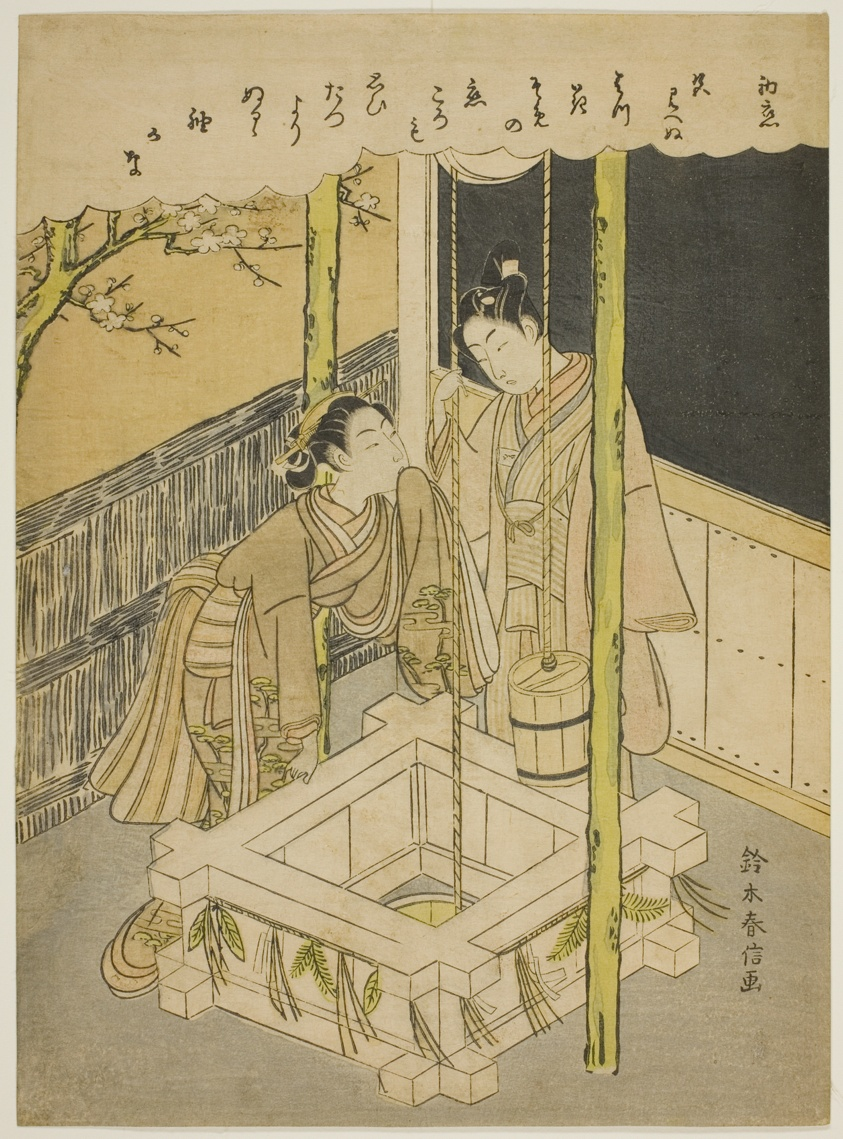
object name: Print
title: First Love (Hatsu koi), a parody of the well-curb episode of the "Tales of Ise"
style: Japanese (culture or style)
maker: Suzuki Harunobu 鈴木 春信; Japanese, 1725 (?)-1770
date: c. 1766/67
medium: Color woodblock print; chuban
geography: Japan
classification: woodblock print; print; asian art